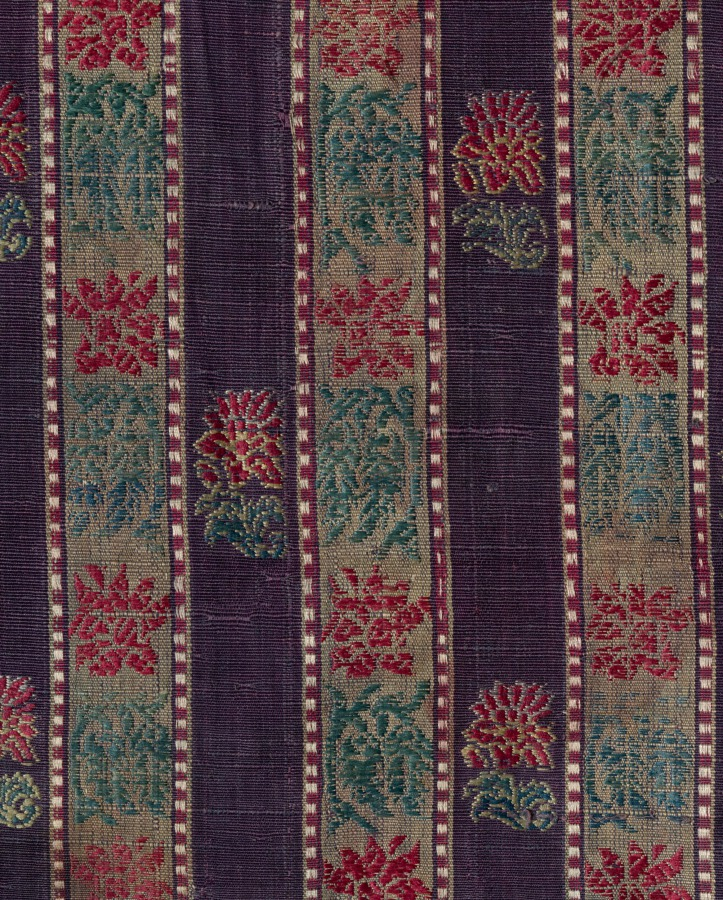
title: Striped Brocade with Flowering Plants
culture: Western India, Surat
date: 1700s or 1800s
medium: Cotton and silk: brocade, “himru”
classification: Textile